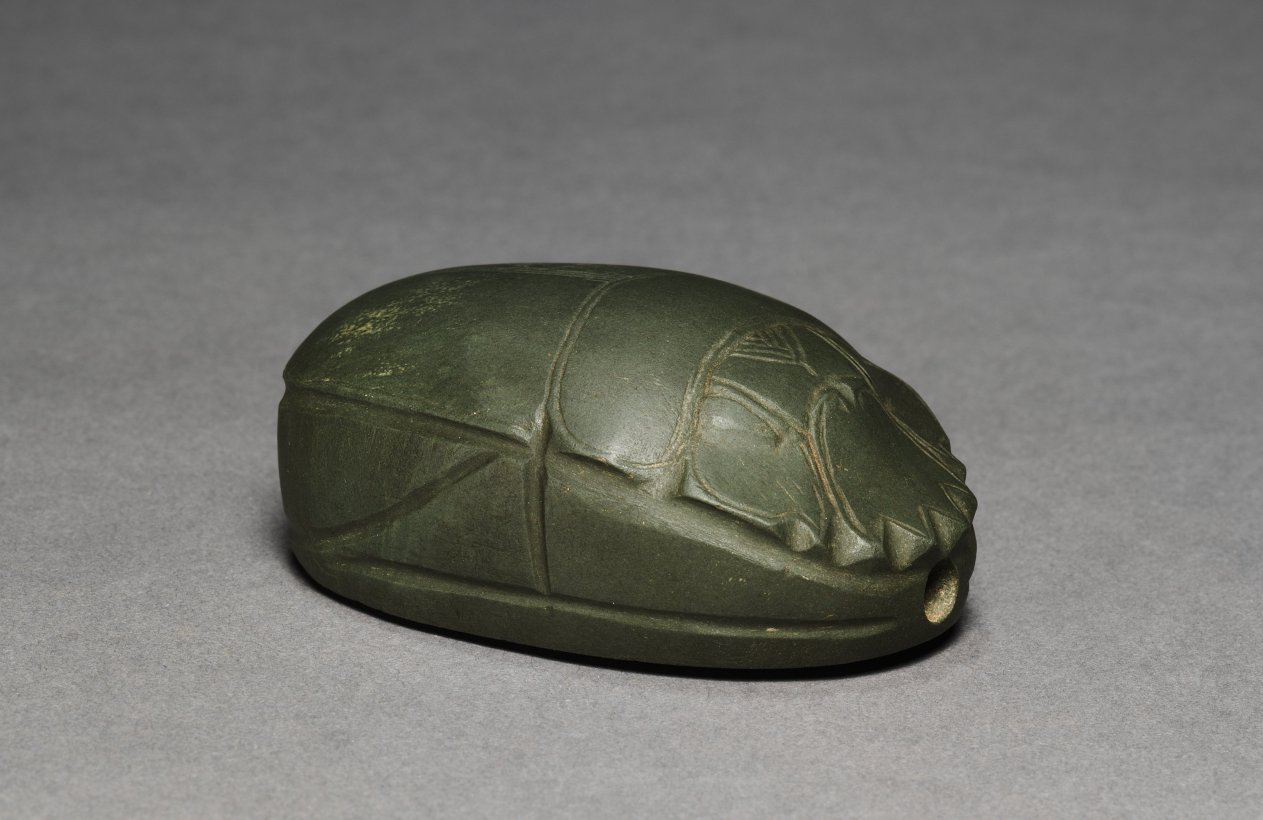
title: Heart Scarab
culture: Egypt, Probably a modern forgery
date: 1900–1913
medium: graywacke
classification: Forgery